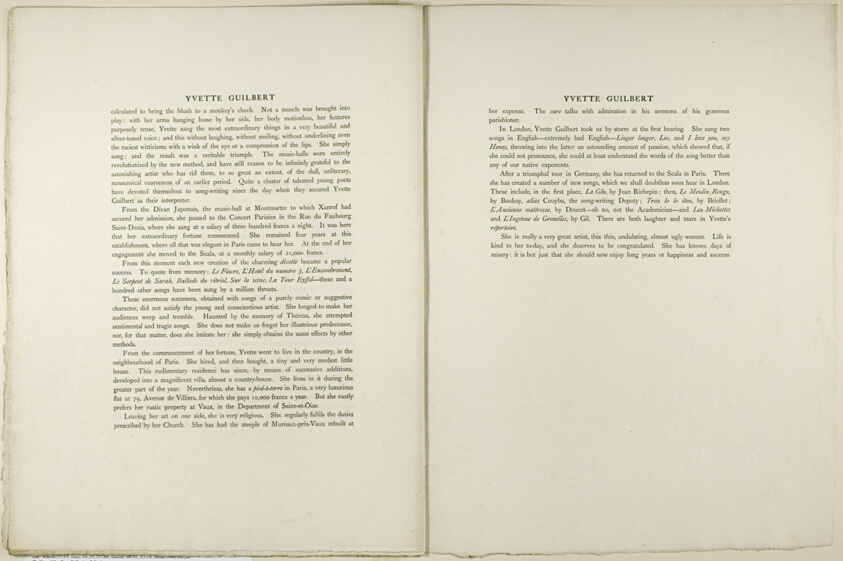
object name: Book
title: Yvette Guilbert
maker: Henri de Toulouse-Lautrec (French, 1864-1901)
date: 1898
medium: Three ivory laid sheets with deckled edges folded in half and sewn to form six pages with letterpress in black and red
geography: France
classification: print; prints and drawing; book